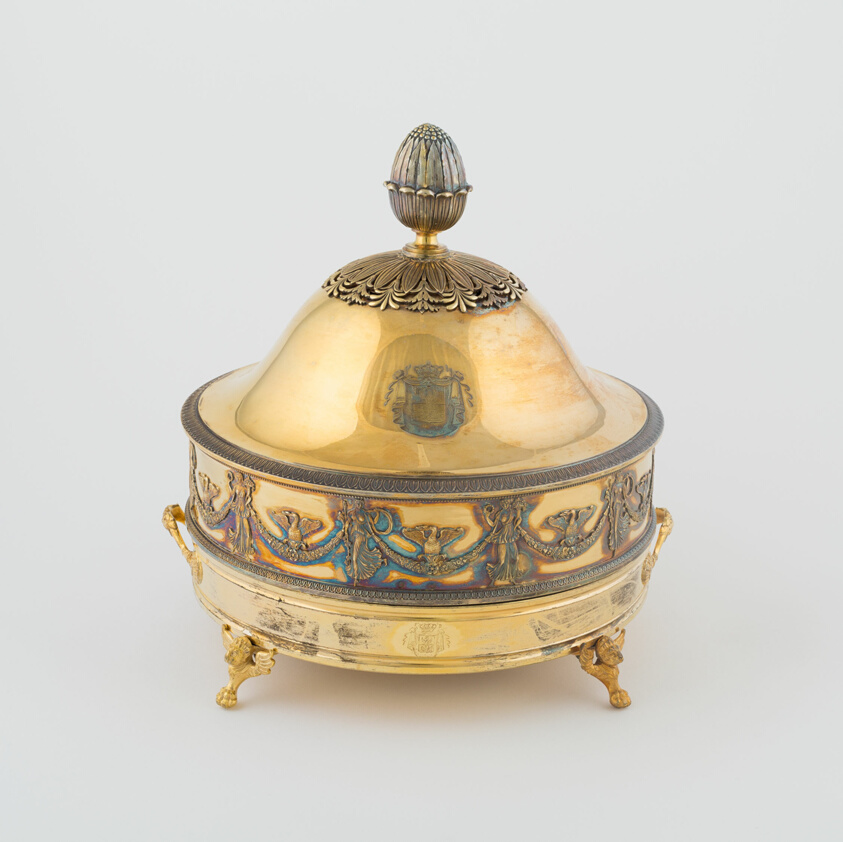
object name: Metalwork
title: Warming Dish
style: napoleonic, empire, Neoclassicism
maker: Martin-Guillaume Biennais (French, 1764–1843); Probably designed after Charles Percier (French, 1764–1838) and; Pierre François Léonard Fontaine (French, 1762–1853); Paris, France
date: c. 1794–1819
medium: Gilt silver and gilt copper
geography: Paris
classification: dish (vessel); silver; metalwork; european decorative arts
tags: Borghese Service, dining, Napoleon